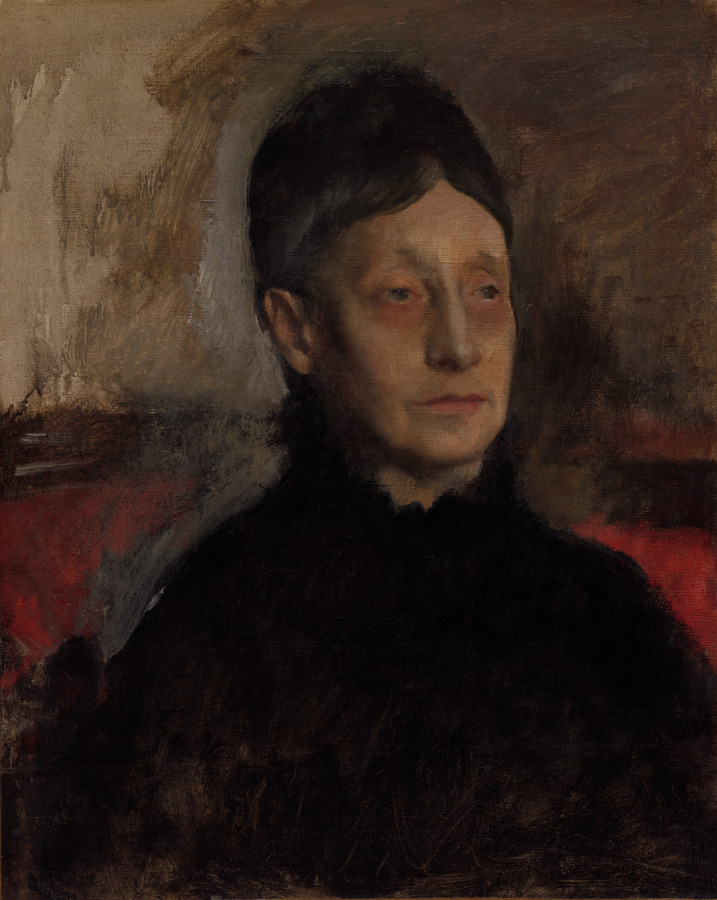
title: Stefanina Primicile Carafa, Marchioness of Cicerale and Duchess of Montejasi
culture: France, 19th century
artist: Edgar Degas (French, 1834–1917)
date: c. 1875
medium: oil on fabric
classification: Painting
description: Although best remembered for his depictions of ballet dancers and race horses, Degas painted many likenesses of his family members. He probably painted this portrait of his aunt, Stefania Carafa (1819–1901), during an extended visit to Naples, where many of his relatives lived. Described in family papers as a highly indulged, fun-loving child, the duchess grew into the stoic, world-weary woman depicted here. No expensive finery reveals her high social rank; indeed she wears a mourning dress, possibly to observe the recent death of her brother Achille.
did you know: Degas was a Parisian by birth, but had family connections around the world, including New Orleans and Italy. In this portrait Degas's aunt, who was a titled member of the aristocracy in southwestern Italy, is captured in loose, flowing strokes with her mourning dress and watery-eyed gaze.